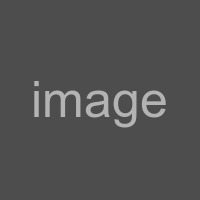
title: Lucknow. Residence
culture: India, 19th century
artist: Photoglob Co. (Zurich, active c. 1890–1910)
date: 1890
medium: Photochrom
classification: Photograph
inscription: Imprinted in gold on recto in lower left corner: “20013. P.Z.-LUCKNOW. RESIDENCE”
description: The Residence, several buildings that housed and served colonial officials, was put under siege during the Indian Rebellion of 1857 against the British East India Company. The British regained control in 1858 but left the ruins as a memorial to their fallen compatriots.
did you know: Photochrom is an ink-based process that produces color images from black-and-white photographic negatives.